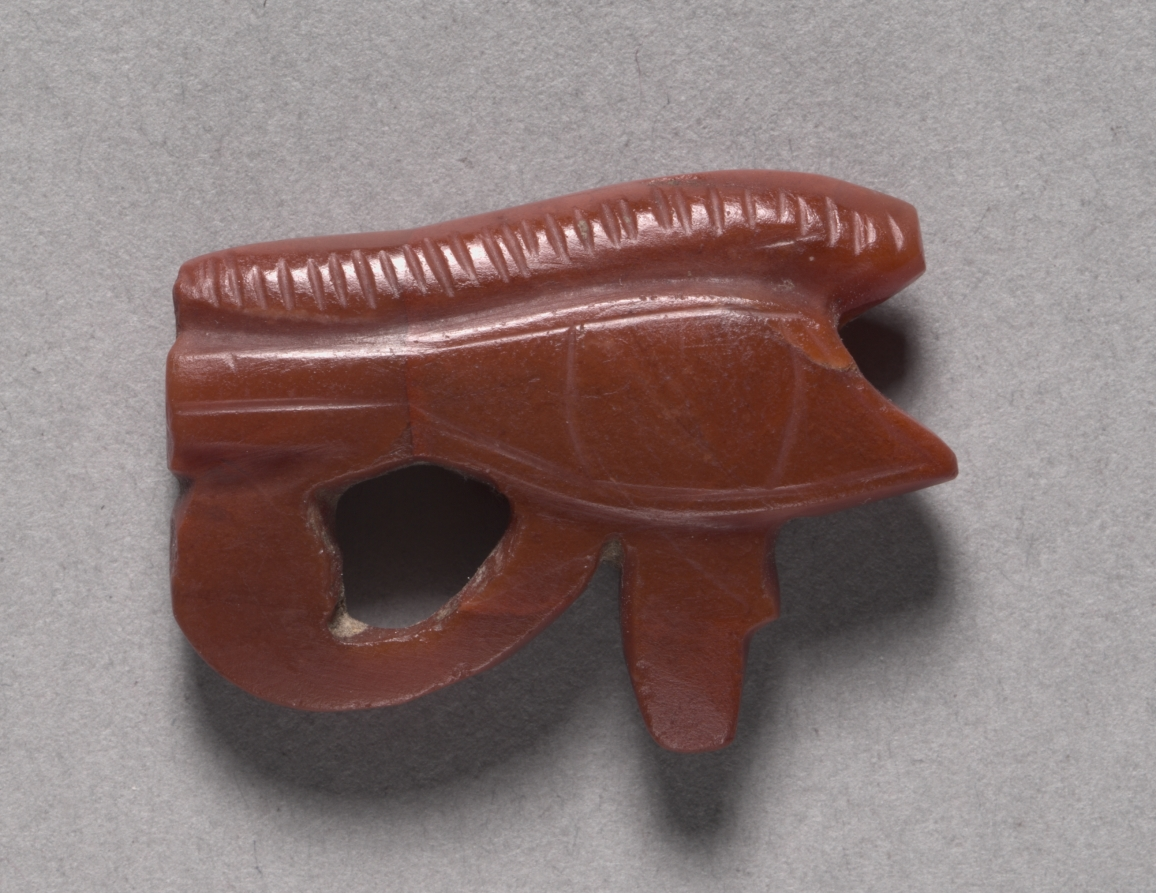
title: Eye of Horus Amulet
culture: Egypt, New Kingdom (1540–1069 BCE), Dynasty 18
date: 1540–1296 BCE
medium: carnelian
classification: Amulets